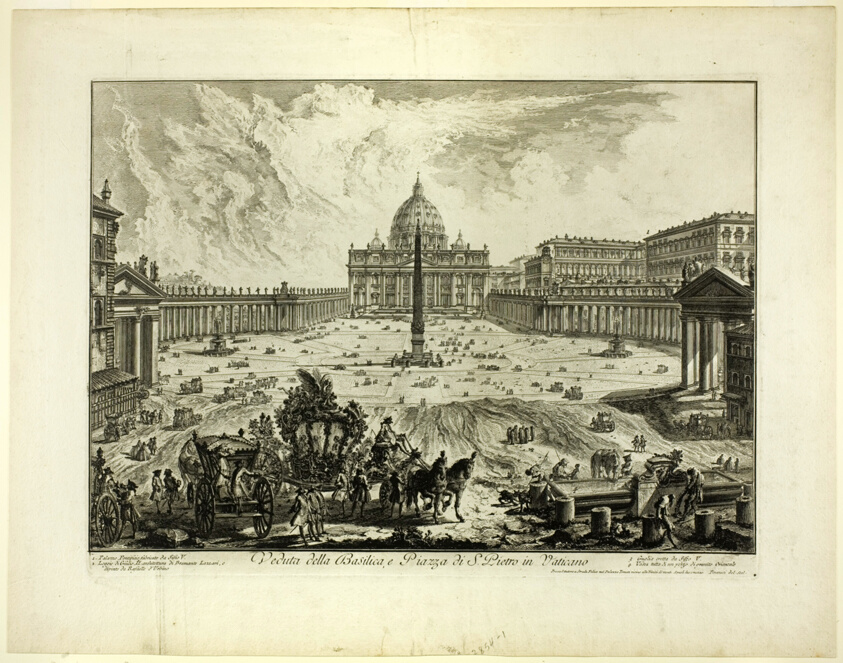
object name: Print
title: View of St. Peter's Basilica and Piazza in the Vatican, from Views of Rome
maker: Giovanni Battista Piranesi (Italian, 1720-1778)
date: 1748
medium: Etching on heavy ivory laid paper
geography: Italy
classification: etching; print; prints and drawing